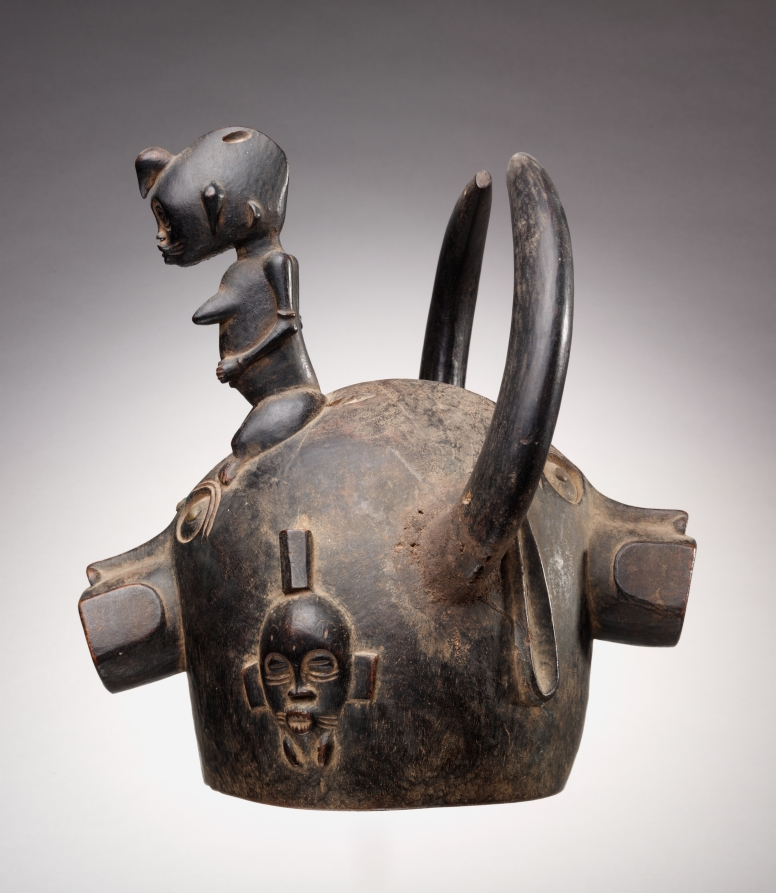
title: Helmet Mask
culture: Africa, West Africa, Côte d'Ivoire, Senufo-style carver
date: early to mid-1900s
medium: Wood, upholstery studs, and colorant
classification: Mask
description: This type of helmet was worn in rituals demonstrating a boy’s transition from one age group to the next, prior to his actual initiation into the secret Poro society. The pre-initiates were viewed as unknowing and anxious oxen, so the horns on such helmets may refer to those of horned cattle. The female figure alludes to women’s supernatural powers, which assure the welfare of Poro members.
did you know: Cowrie shells, feathers, and other accessories once decorated this helmet.